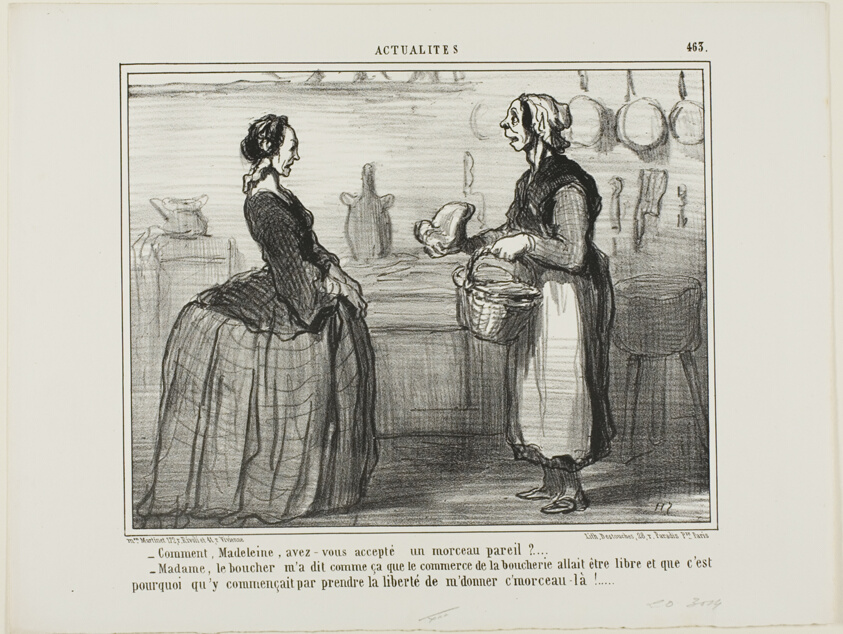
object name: Print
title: “- Madeleine, how could you ever accept a piece of meat like this one? - Madame, the butcher told me that the meat commerce will be free, therefore he took the liberty of giving me this piece,” plate 463 from Actualités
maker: Honoré Victorin Daumier; French, 1808-1879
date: 1857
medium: Lithograph in black on white wove paper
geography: France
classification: lithograph; print; prints and drawing